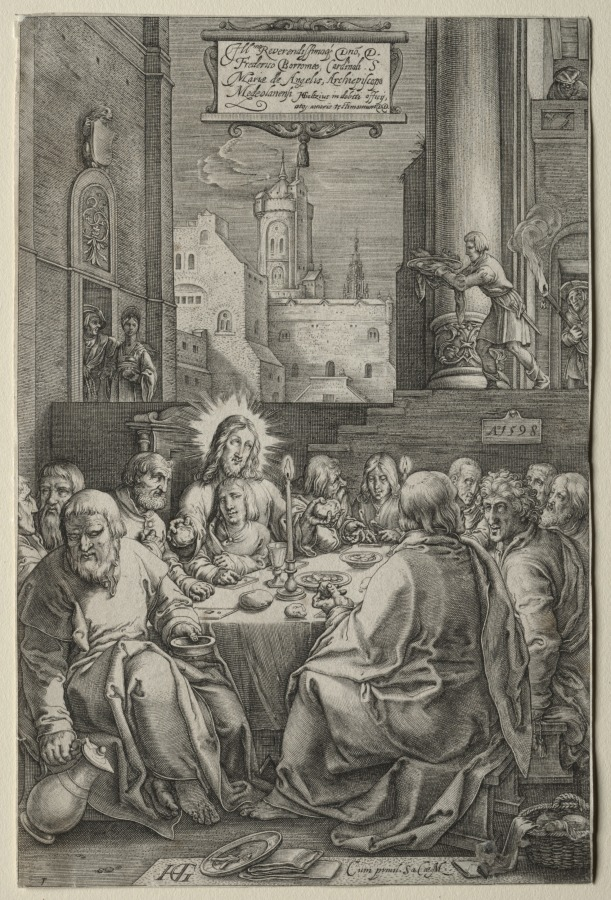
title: The Passion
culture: Netherlands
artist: Hendrick Goltzius (Dutch, 1558–1617)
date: 1596–98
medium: engraving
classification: Print